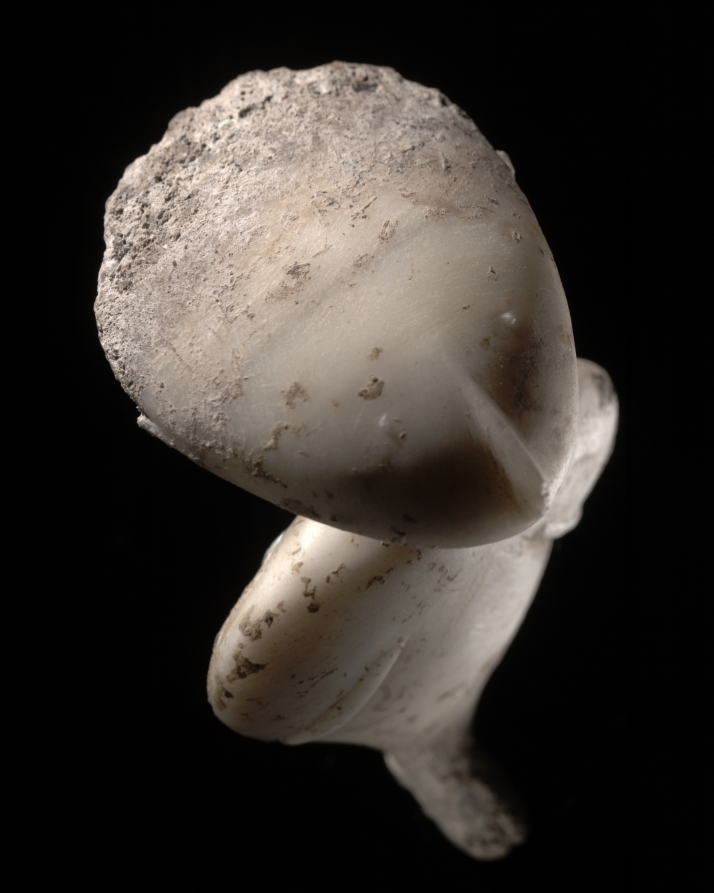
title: Statuette of a Woman: "The Stargazer"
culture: Western Anatolia, early Bronze Age (c. 3300–1200 BCE)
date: c. 3000 BCE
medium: marble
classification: Sculpture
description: "The Stargazer" moniker was given to this diminutive marble sculpture because its upturned head looks toward the heavens. Details carved into the stone are visible while painted features have been lost to time. We do not know how this object was used, but its enigmatic nature invites speculation.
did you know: We can identify this mysterious figure as female by the inscribed pubic triangle below her waist.